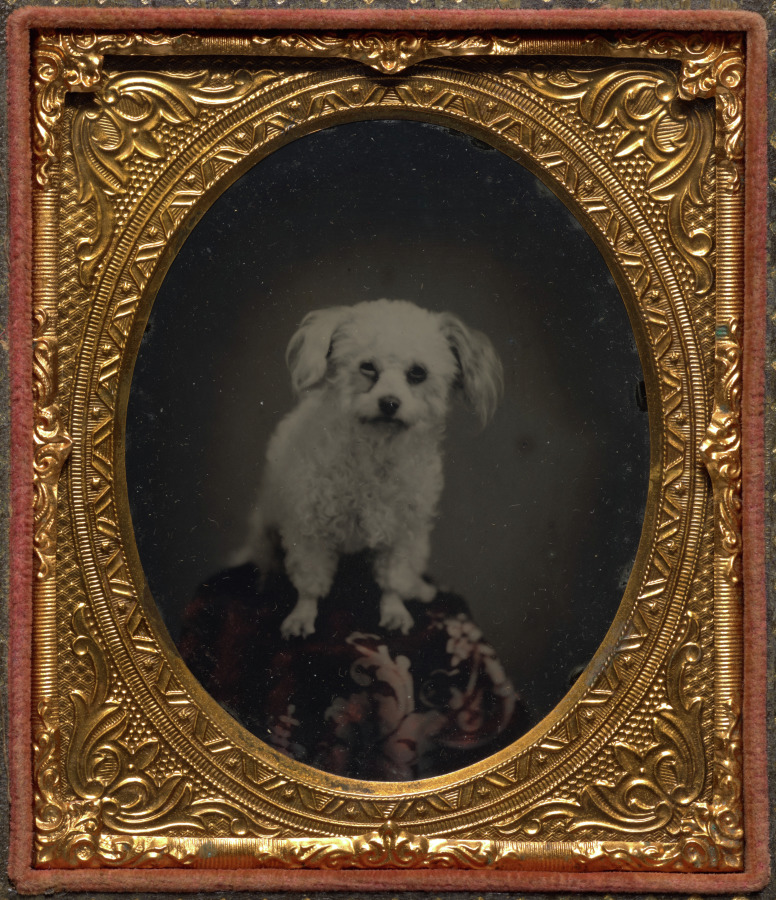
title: Poodle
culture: America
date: c. 1861–63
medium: ambrotype, tinted, sixth plate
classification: Photograph